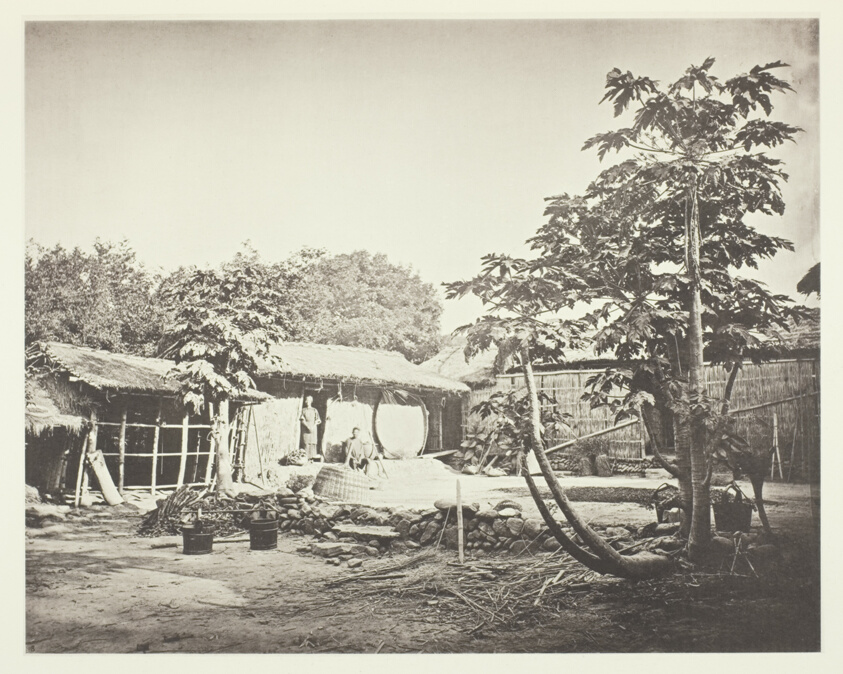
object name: Photograph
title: A Pepohoan Dwelling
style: 19th century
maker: John Thomson (Scottish, 1837–1921)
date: c. 1868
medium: Collotype, pl. III from the album "Illustrations of China and its People, Volume II" (1873)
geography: Scotland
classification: photography; photograph